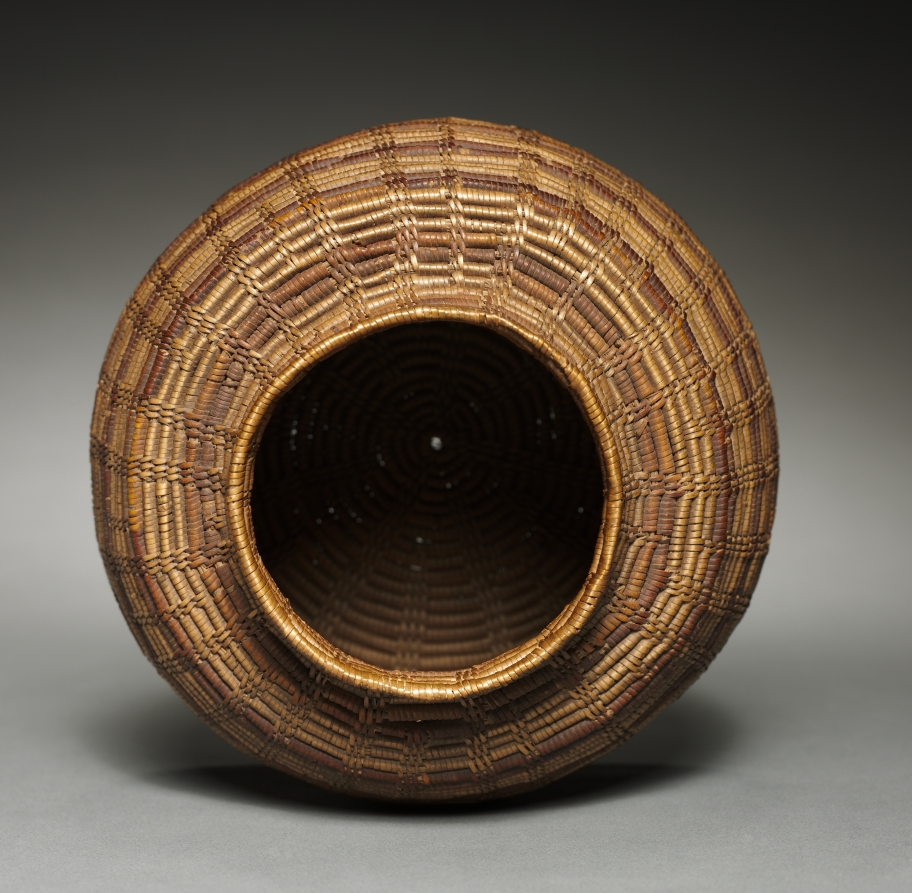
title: Jar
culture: California, Tübatulabal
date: 1895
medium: Sumac, yucca root; coiled, skip-stitch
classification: Basketry